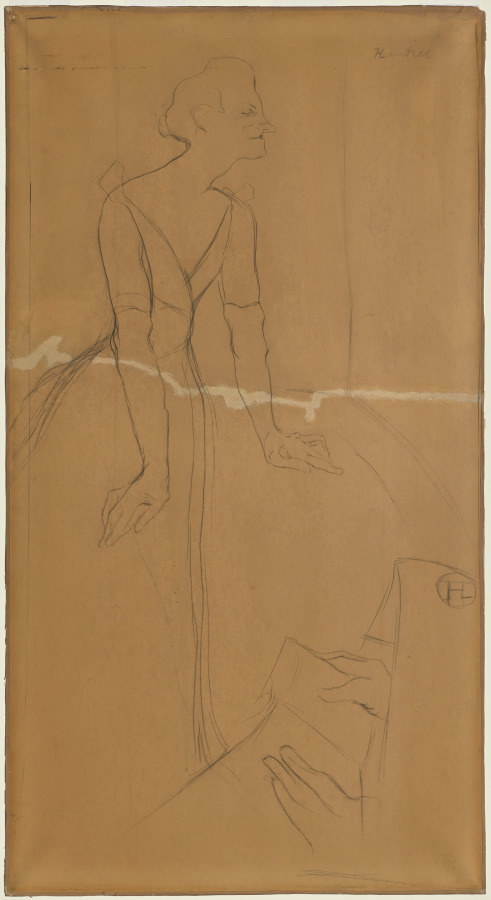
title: Yvette Guilbert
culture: France, 19th century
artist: Henri de Toulouse-Lautrec (French, 1864–1901)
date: c. 1894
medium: black crayon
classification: Drawing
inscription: signed, in black crayon, at upper right: TLautrec; initialed (monogram), in black crayon at right center.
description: This drawing depicts Yvette Guilbert, a popular Parisian cabaret performer who was the subject of numerous prints, posters, drawings, and paintings by Henri de Toulouse-Lautrec. Here, Lautrec began to work out the composition of a poster that Guilbert commissioned from him to publicize her upcoming season at Les Ambassadeurs, a popular night club. A more finished study is part of the collection of the Musée Toulouse-Lautrec in Albi, France, but the poster itself was never realized after Guilbert rejected the design as unflattering.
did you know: Yvette Guilbert's cabaret act was centered on the distinctive long black gloves that she wore during performances.